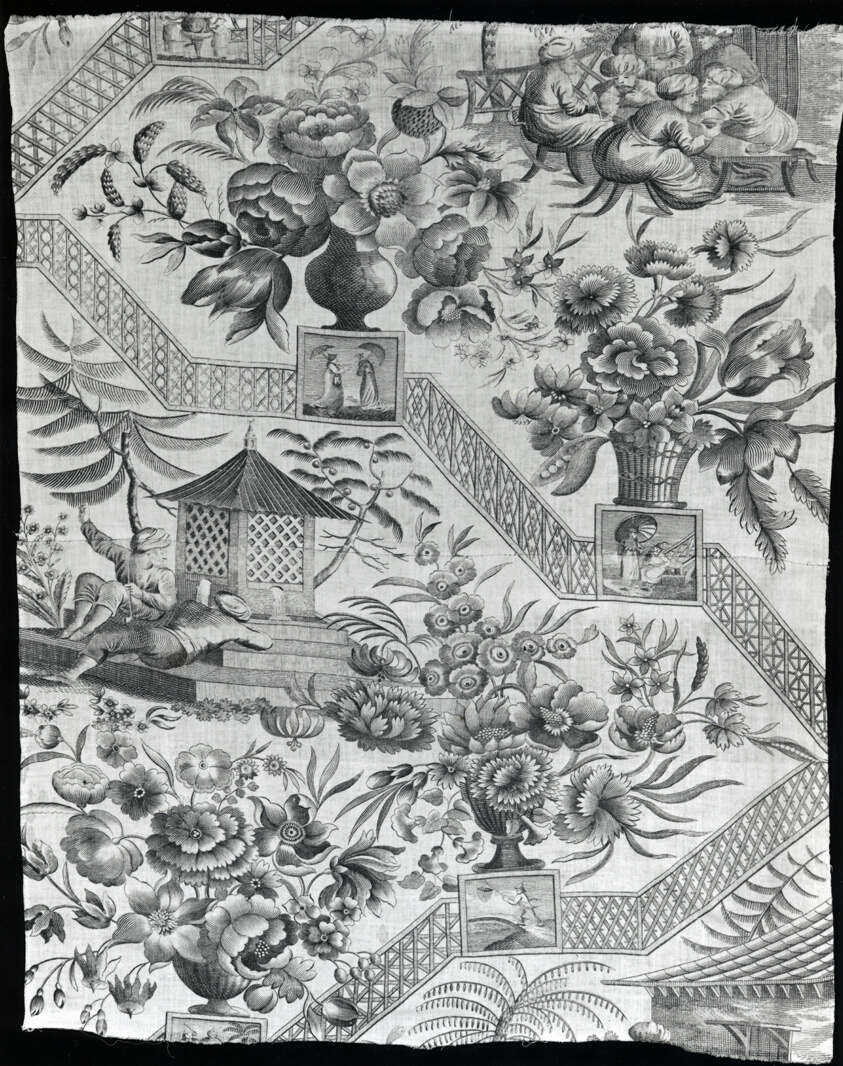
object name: Textile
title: Panel (Furnishing Fabric)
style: chinoiserie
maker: England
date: Late 18th early 19th century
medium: Cotton, plain weave; copperplate printed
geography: England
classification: textile; weaving - printed; furnishing textile